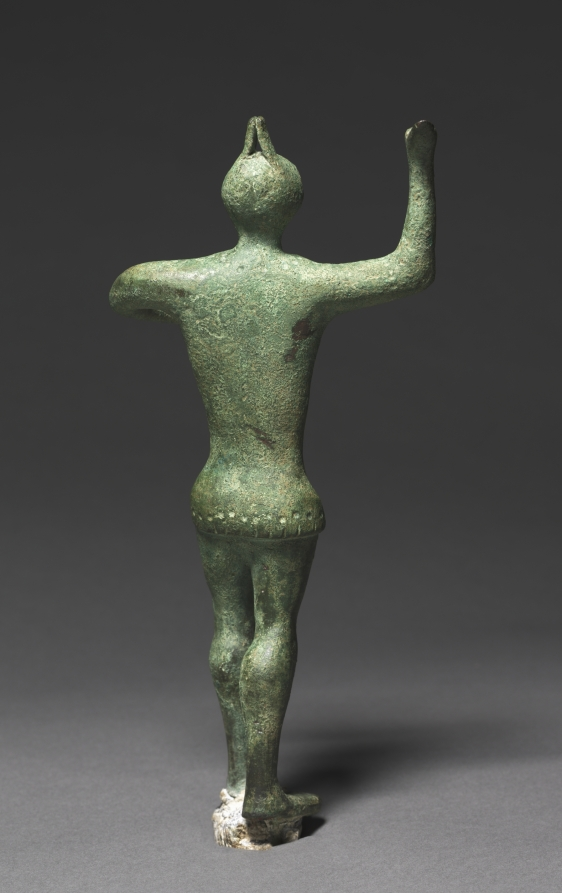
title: Statuette of a Warrior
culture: Etruscan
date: 500–450 BCE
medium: bronze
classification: Sculpture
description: Striding forward with its left foot, this warrior likely once held a shield in the left hand and a spear or sword in the right. The statuette was acquired together with a miniature bronze sword with which it was said to have been found; a photograph taken around 1890 shows the warrior with the sword attached—probably wrongly—to the left hand. He wears an unusual helmet with two raised elements on top, and a simple v-neck cuirass or tunic with a lower border of dots and flaps. Many similarly posed bronze figurines have been found across central Italy, but scholars disagree as to whether they represent divine or mortal warriors.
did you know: The lump of lead beneath its feet probably once secured this figurine to a base.